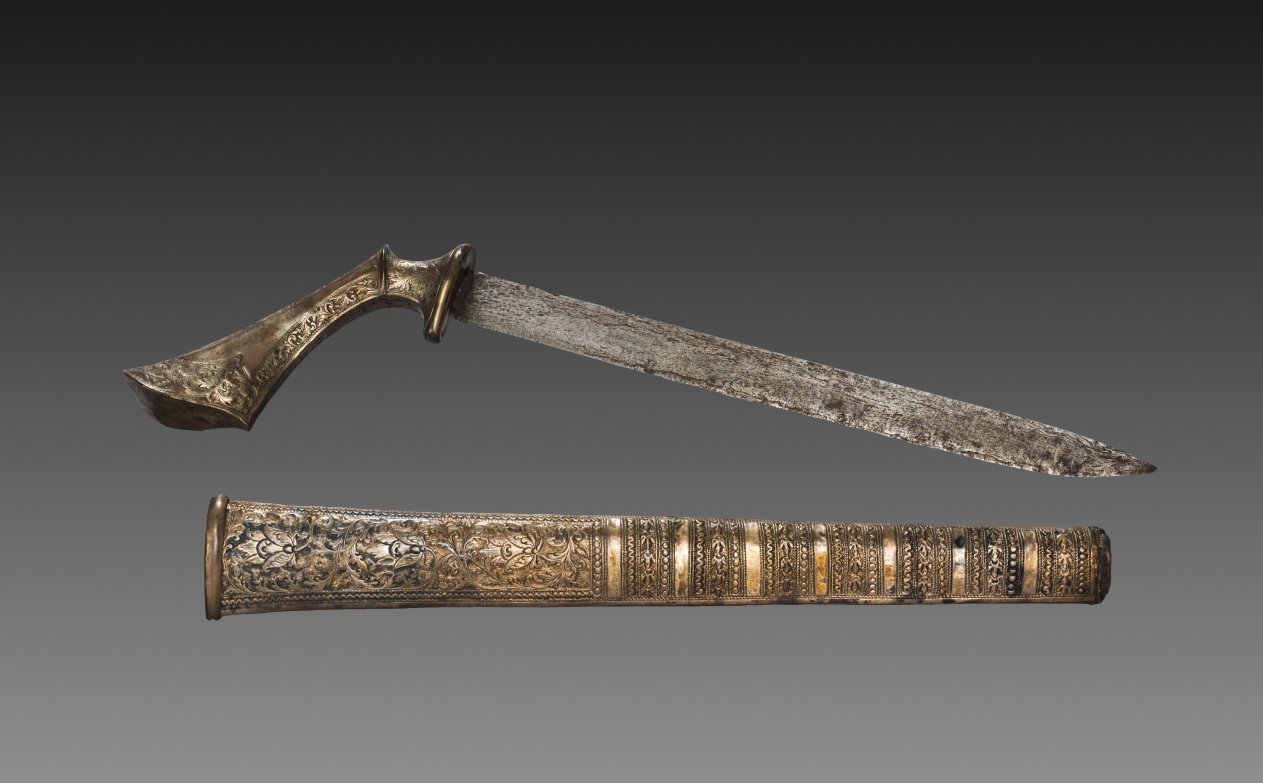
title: Knife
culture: Sumatra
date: 1500s–1800s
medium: Blade: steel; handle: copper alloy with silver gilt; scabbard: copper alloy, silver gilt, wood, and textile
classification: Arms and Armor